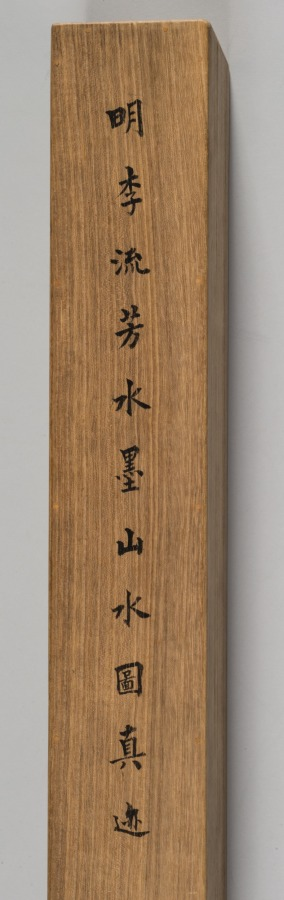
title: Playing the "Hand Game"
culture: Japan, Edo period (1615–1868)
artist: Hasegawa Yasumasa (Japanese)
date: c. 1760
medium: hanging scroll; ink and color on paper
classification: Painting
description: This scene depicts three people playing a game in which three players make hand gestures simultaneously. The relationship among the gestures determines the winner. Known as hand games, during the eighteenth century they were popular in Japan among courtesans. In this version, the contestants use both hands, indicating a special variation such as the fox hand game, which features gestures for a fox, a village leader, and a hunter.